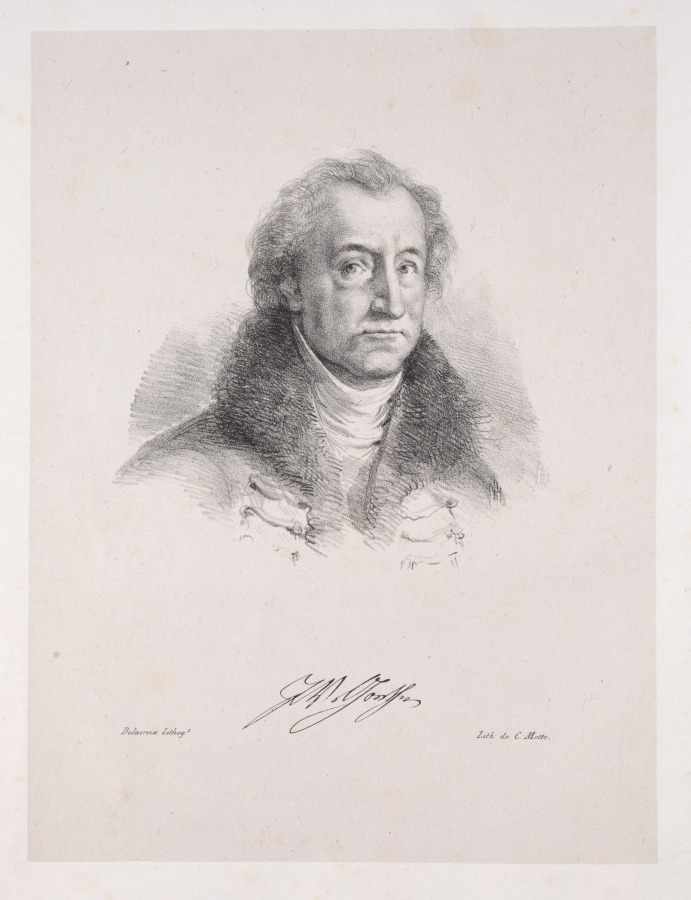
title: Illustrations for Faust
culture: France, 19th century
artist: Eugène Delacroix (French, 1798–1863)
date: 1828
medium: lithograph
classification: Print